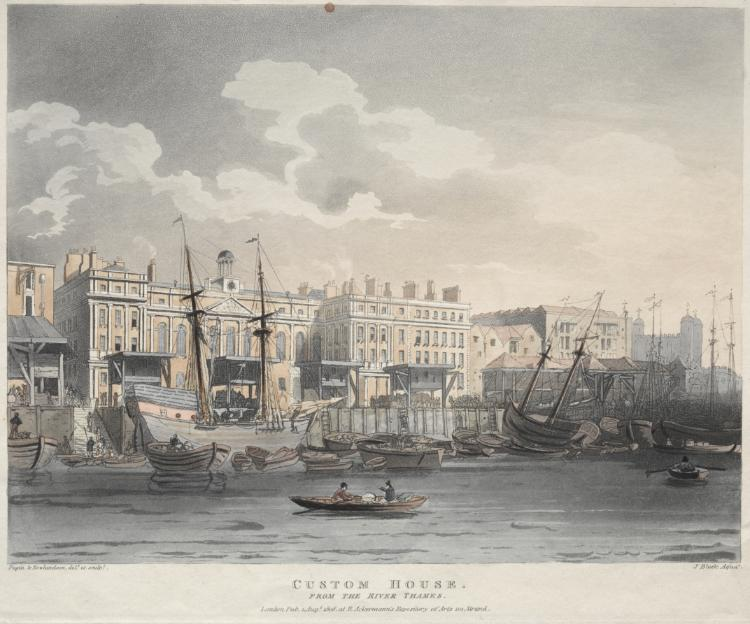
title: Customs House, from the Thames River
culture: England, 19th century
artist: J. Bluck (British)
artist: after Thomas Rowlandson (British, 1756–1827)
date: 1808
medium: engraving and aquatint colored by hand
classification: Print